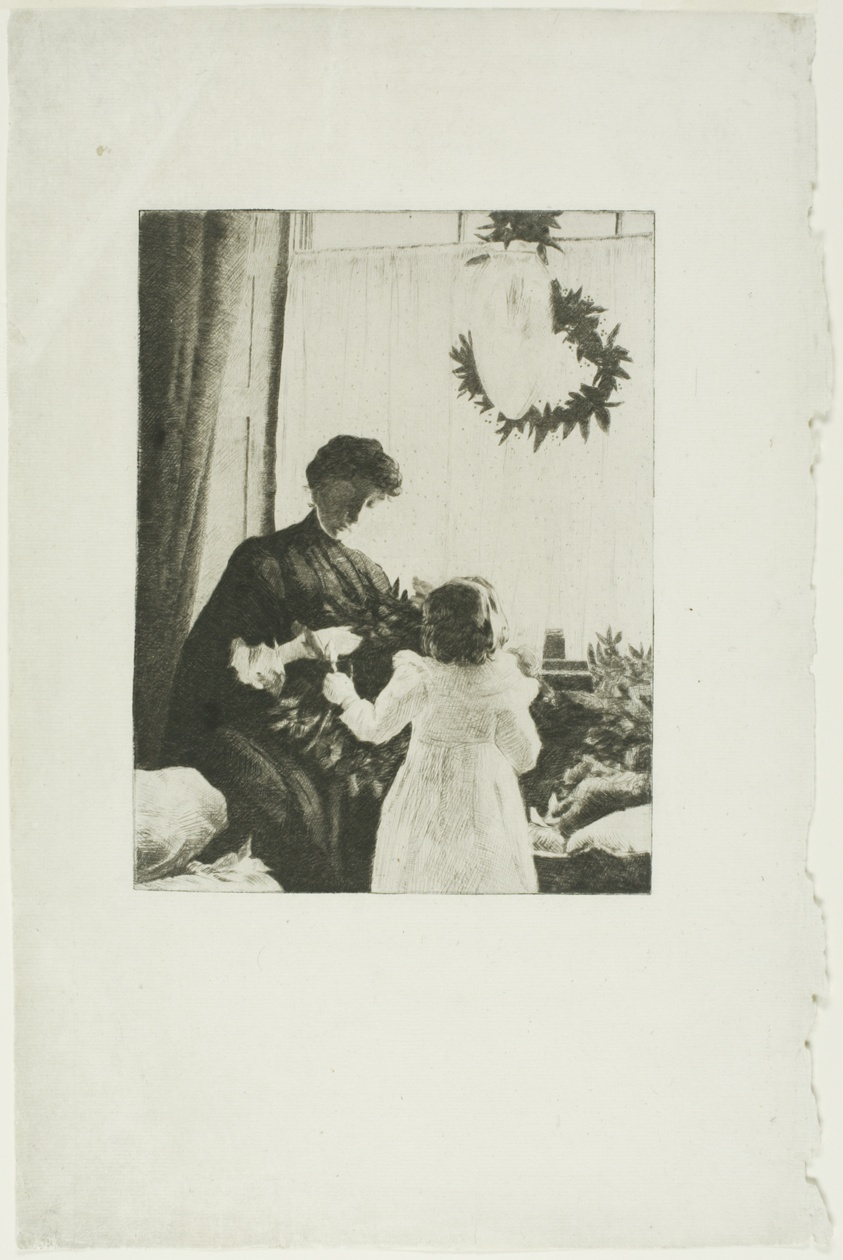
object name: Print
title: Christmas Greens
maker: Julian Alden Weir (American, 1852-1919)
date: 1889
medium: Etching on off-white laid paper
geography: United States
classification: etching; print; prints and drawing